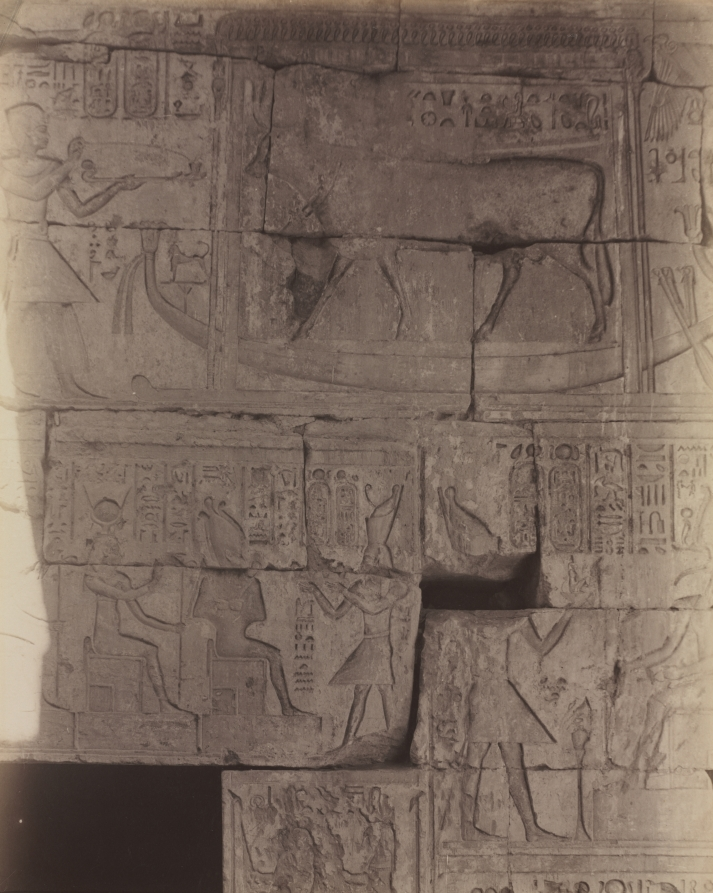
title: Deir el-Medineh, Sacred Barge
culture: England, 19th century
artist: Antonio Beato (British, c. 1825–1903)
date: c. 1870s - 1880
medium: albumen print from wet collodion negative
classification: Photograph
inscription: Written in pencil on verso: "7"; "AB-5858-Z"; "266/Der el Medineh/Barque Sacre"